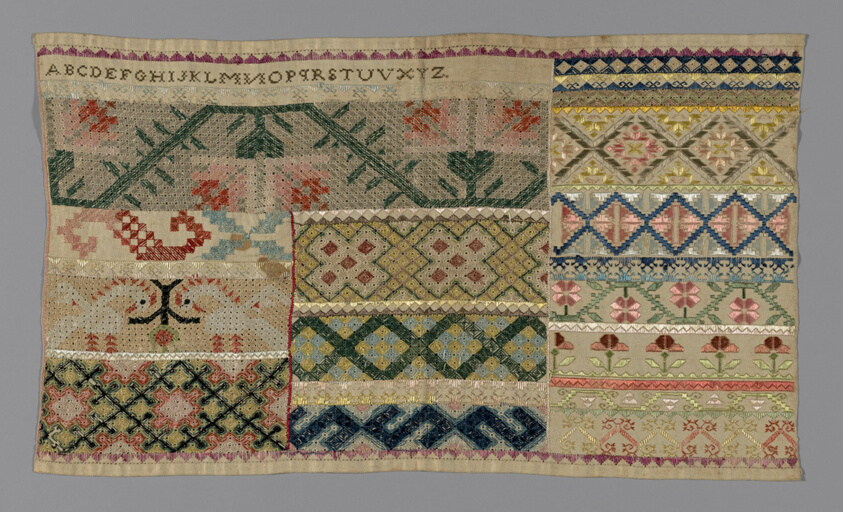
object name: Textile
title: Sampler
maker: Mexico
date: 19th century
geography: Mexico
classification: textile; needlework (visual works); sampler